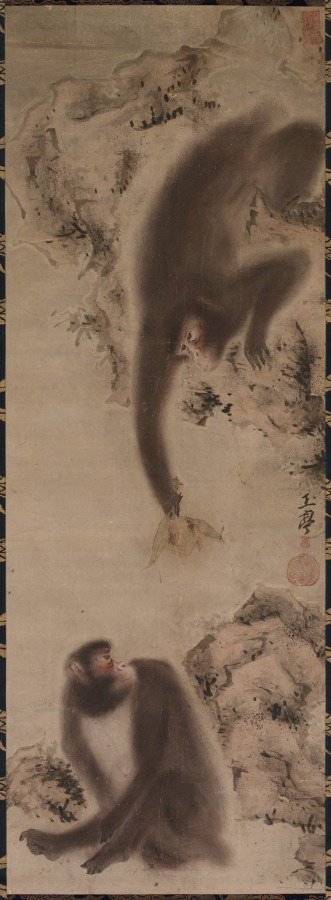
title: Monkeys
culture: Japan, Edo period (1615–1868)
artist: Gyokutei Katsu (Japanese)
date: c. 1800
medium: hanging scroll; ink on paper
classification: Painting